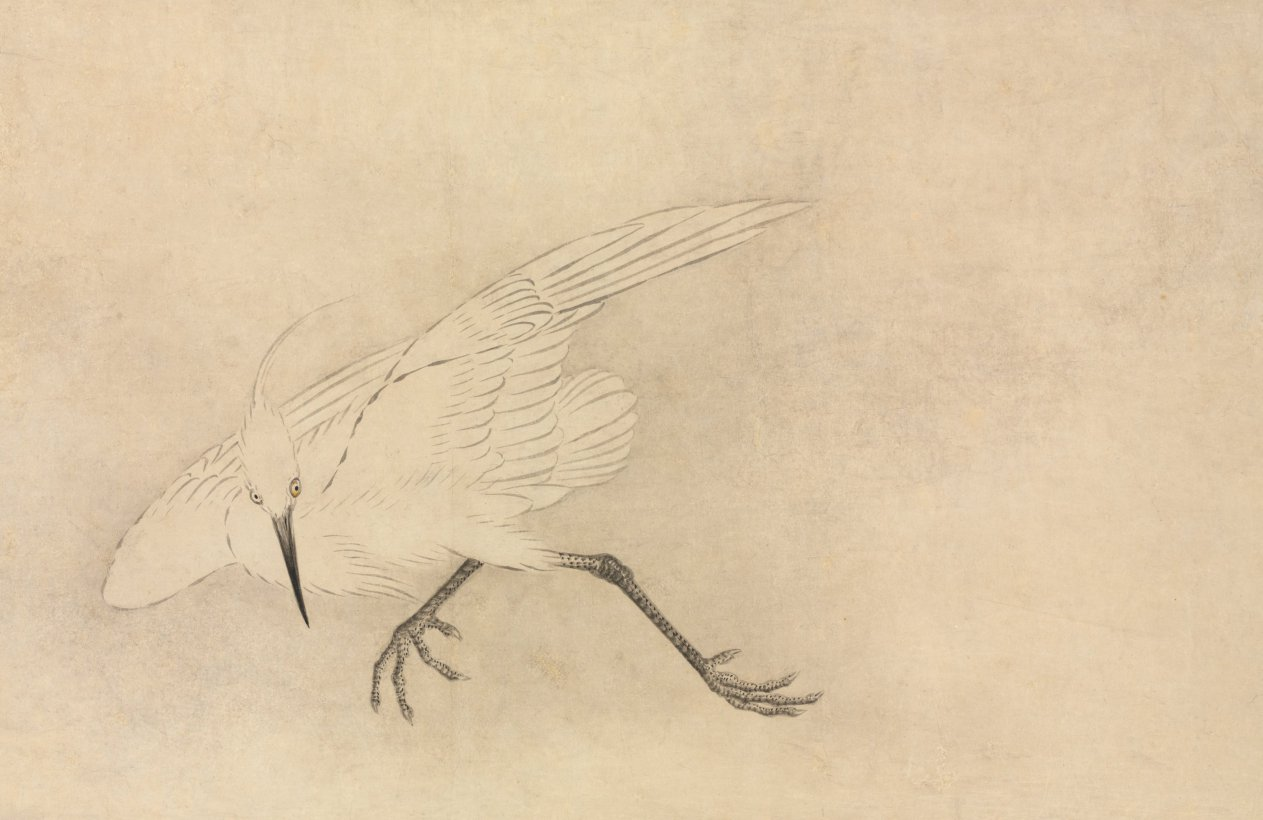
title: Flowers and Birds in a Spring Landscape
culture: Japan, Muromachi period (1392–1573)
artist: attributed to Kano Motonobu (Japanese, c. 1476–1559)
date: 1500s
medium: One of a set of sliding door panels mounted as hanging scrolls; ink and color on paper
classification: Painting